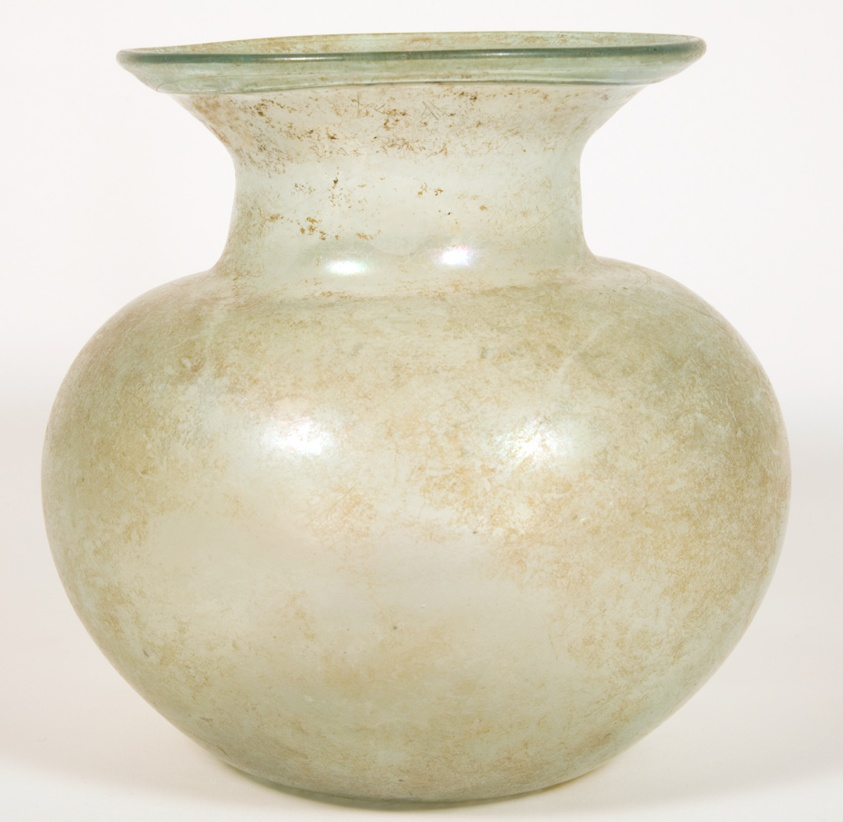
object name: Vessel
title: Jar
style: syrian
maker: Roman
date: 2nd-3rd century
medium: Glass, blown technique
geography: Syria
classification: vessel; glass; ancient art